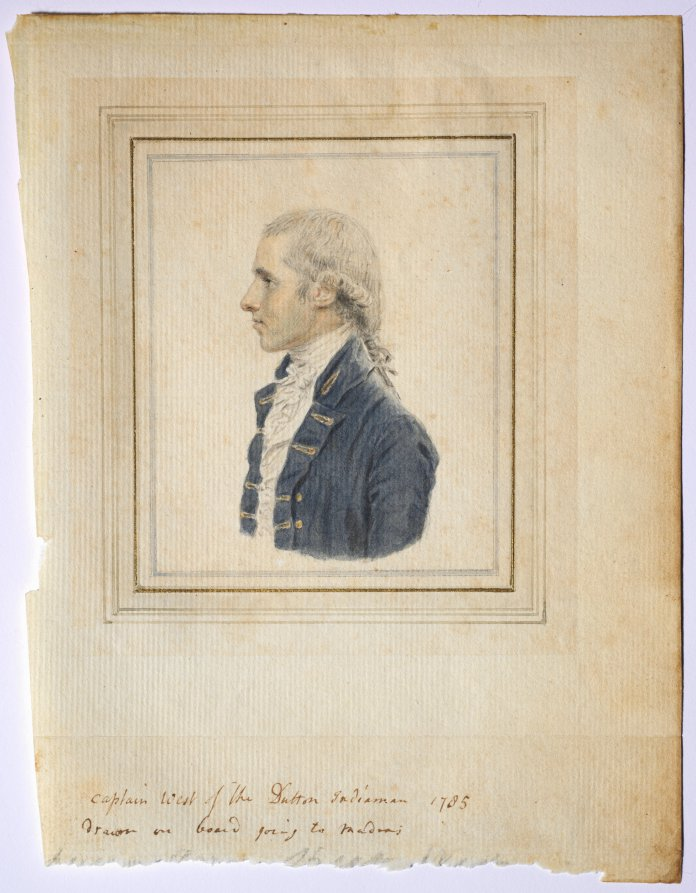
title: Portrait of Sir Captain West of the Dutton Indiaman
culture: England, 18th century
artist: John I Smart (British, 1741–1811)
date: 1785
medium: watercolor over traces of black chalk, with metallic gold paint on laid paper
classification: Portrait Miniature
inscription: by artist, across bottom, in brown ink: Captain West of the Dutton Indiaman 1785 / drawn on board going to Madras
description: Smart painted Captain West’s head in profile, turned to the right. His powdered hair is worn en queue with curls above his ears and white powder on his shoulders. He has long eyelashes, parted lips, and a grayish cast to his skin tone, particularly over his beard. West dons a blue coat with gold buttonholes embroidered in gold and a white waistcoat, high collar, and cravat tied in a small bow. This work is a finished drawing by Smart, evidenced in part by its larger size and by the fact that the painting of the sitter’s clothing is complete and the bust is placed within an elaborate border comprised of blue, metallic gold, and gray lines. This finished quality does not preclude the possibility that the drawing may also have functioned as a preparatory sketch for a miniature on ivory, which has not been located. Captain James West sailed the Dutton Indiaman from England to Madras, India, on several occasions, including Smart’s voyage in 1785. At least one of the sons of British judge Sir Elijah Impey was traveling with Smart on his journey to India and had his portrait taken by the artist. Another of Impey’s sons wrote of an earlier return passage to England made with Captain West in 1784, shedding light on the sea captain’s character and disposition. Impey’s account conveys not only West’s personality but the atmosphere that prevailed on the ship over which the captain presided and on which Smart traveled and worked. As indicated by an inscription in the artist’s hand, this portrait was painted by Smart while he was aboard the Dutton en route to Madras and probably retained by the artist as a memento. In addition to the portrait of “Master Impey,” Smart is known to have taken the likeness of other figures while aboard the Dutton, including the quartermaster “Baker” and a French ship called the Consalateur, which was intercepted by the Dutton while sailing to India. The current location of both works is unknown.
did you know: In 1784 it was written that "Captain James West, had the just reputation of being a first-rate mariner, a well-informed, and thoroughly practical man of business, and in every way worthy of confidential intimacy."